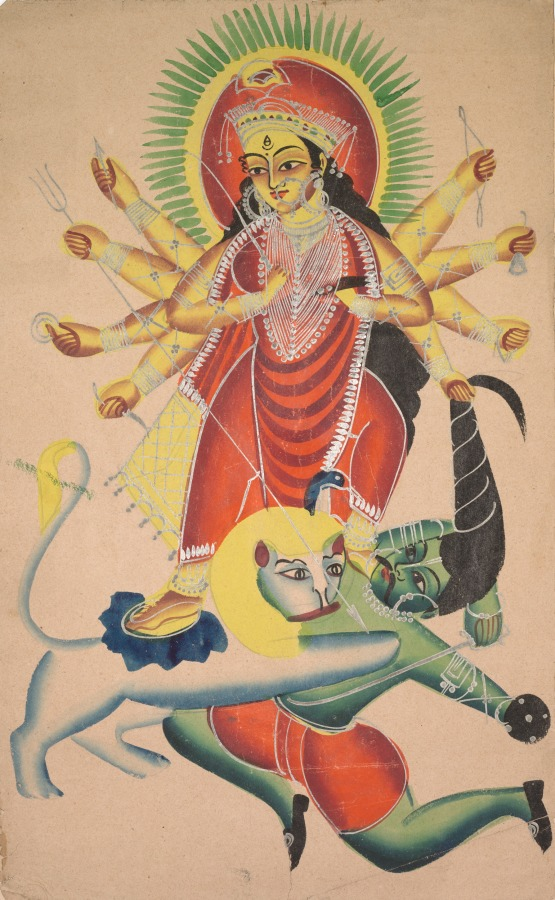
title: Durga Killing the Demon Mahisha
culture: Eastern India, Bengal, Kolkata, Kalighat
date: c. 1890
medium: Gum tempera, graphite, ink, and tin on paper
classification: Painting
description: A ten-armed Durga stands triumphant as she grabs the hair of the buffalo demon’s true form, one foot on his neck, about to plunge the spear into his heart. Interestingly, the demon wears European buckled shoes; this painting was made in the British enclave then known as Calcutta. Made by artists who sold their works in a goddess temple bazaar, this painting was made with rapid brush strokes and thin paint layers on inexpensive paper. Exuberant in their devotional vitality and visceral color sensibilities, Kalighat paintings achieved acclaim among modern artists of the 20th century.